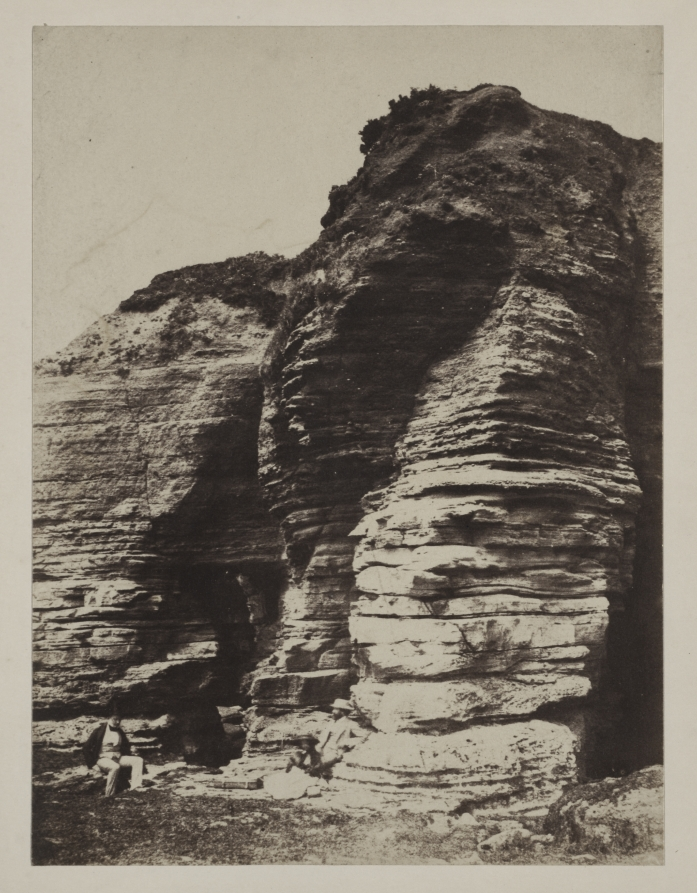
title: Rocks at Livermead near Torquay (England)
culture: England, 19th century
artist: attributed to John Dillwyn Llewelyn (British, 1810–1882)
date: c. 1852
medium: salted paper print from calotype negative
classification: Photograph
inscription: Written in pencil on verso: "Rocks at Livermead / Torquay"